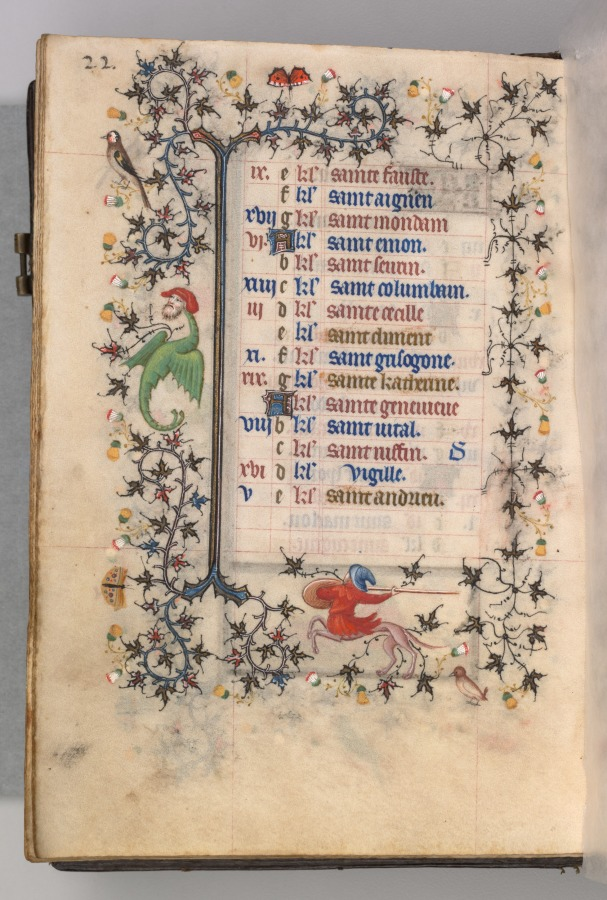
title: Hours of Charles the Noble, King of Navarre (1361-1425): fol. 11v, November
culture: France, Paris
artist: Master of the Brussels Initials and Associates (French)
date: c. 1405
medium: ink, tempera, and gold on vellum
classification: Bound Volume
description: This precious volume was obviously highly prized by its owner, the French-born King of Navarre, who had his coat of arms painted on no less than twenty folios. Rather than directly commissioning this manuscript from a specific workshop, Charles the Noble may have acquired his book of hours—perhaps ready-made for the luxury market—while on a trip to Paris in 1404–5. A collaborative effort, six painting styles are seen within the pages of this codex, those of two Italians, two Frenchmen, and two Netherlanders. The painter who was responsible for the planning and decoration of the book, and who produced 17 of the large miniatures, was a Bolognese artist known as the Master of the Brussels Initials. His principal assistant, responsible for most of the borders, was a Florentine who signed his name "Zecho" da Firenze on folio 208 verso.